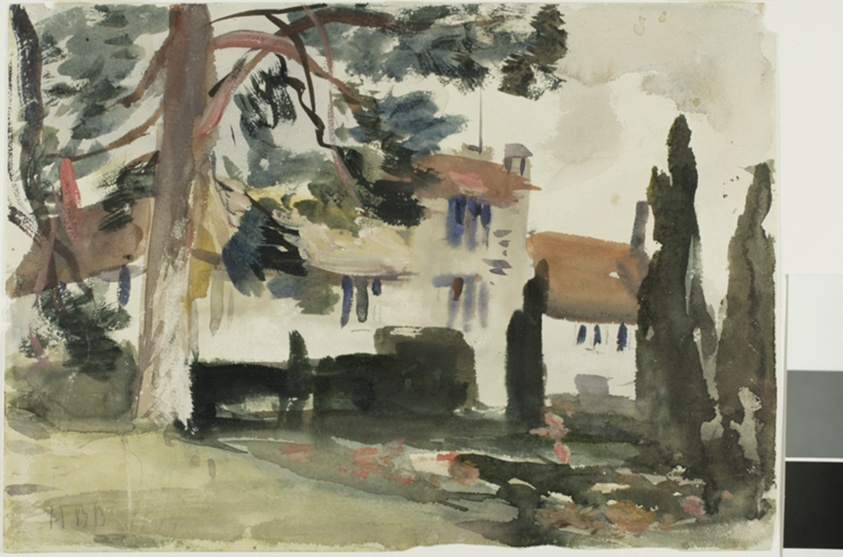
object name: Drawing and Watercolor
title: Ightham Mote, Kent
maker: Hercules B. Brabazon; English, 1821-1906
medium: Watercolor on paper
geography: France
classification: watercolor; drawings (visual works); prints and drawing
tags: Century of Progress, world's fairs, Chicago World's Fairs